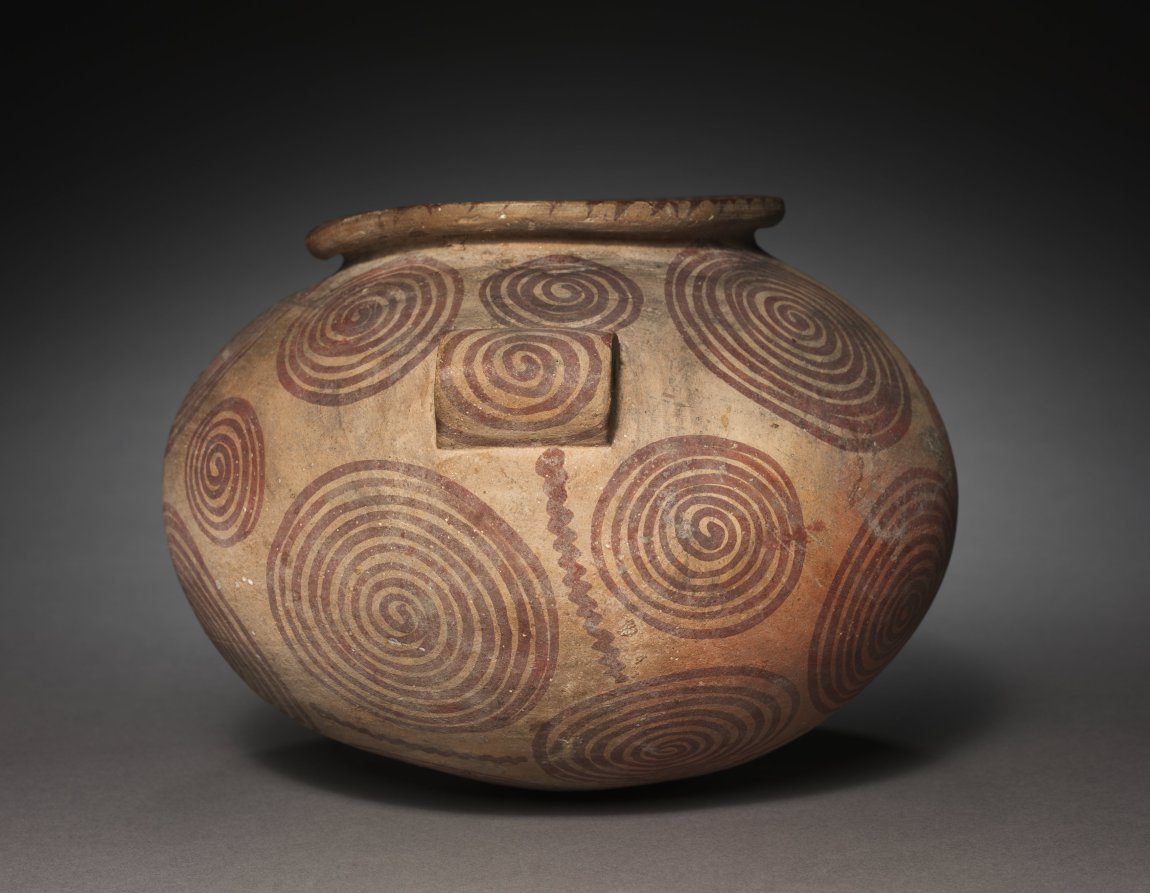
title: Squat Jar with Lug Handles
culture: Egypt, Predynastic (5000–2950 BCE), Naqada IIb (3650–3300 BCE)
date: 4000–3000 BCE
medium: marl clay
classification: Vessels